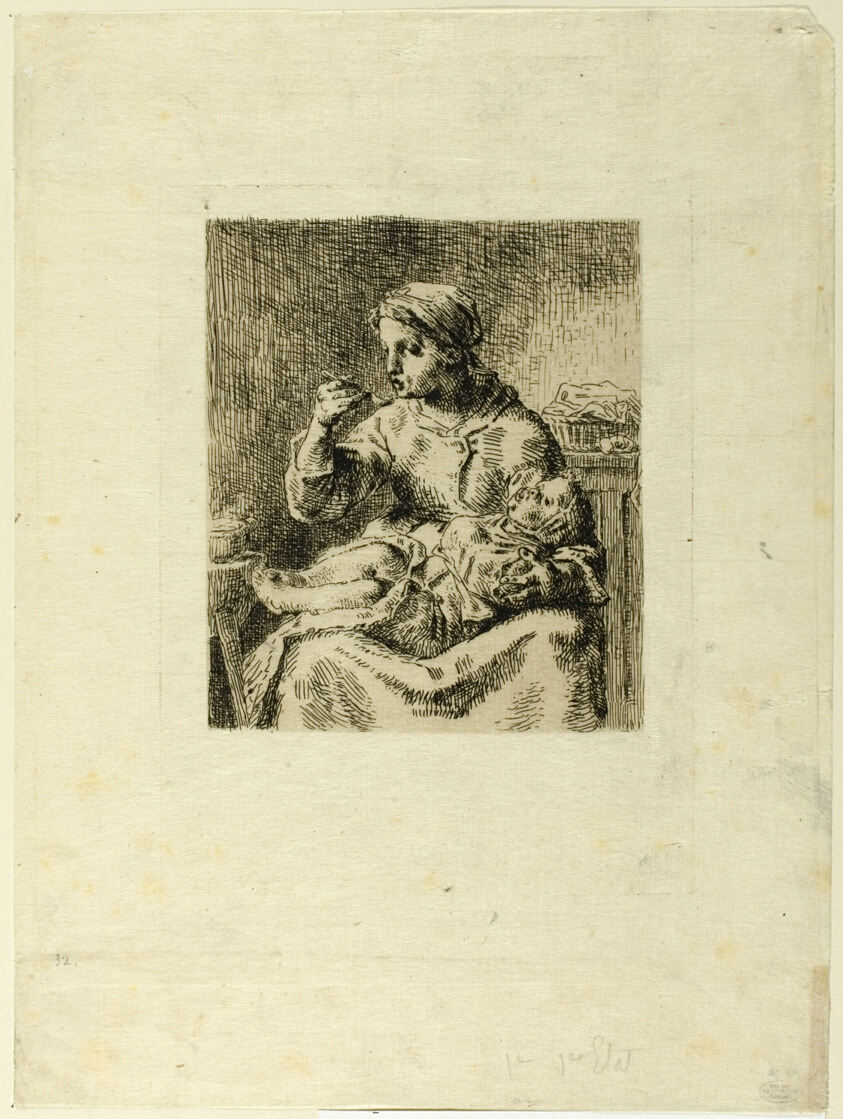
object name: Print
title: Woman Feeding Her Child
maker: Jean François Millet (French, 1814-1875); printed by Auguste Delâtre (French, 1822-1907); Félix Henri Bracquemond (French, 1833-1914)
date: 1861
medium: Etching and drypoint on ivory Japanese paper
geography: France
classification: etching; print; prints and drawing